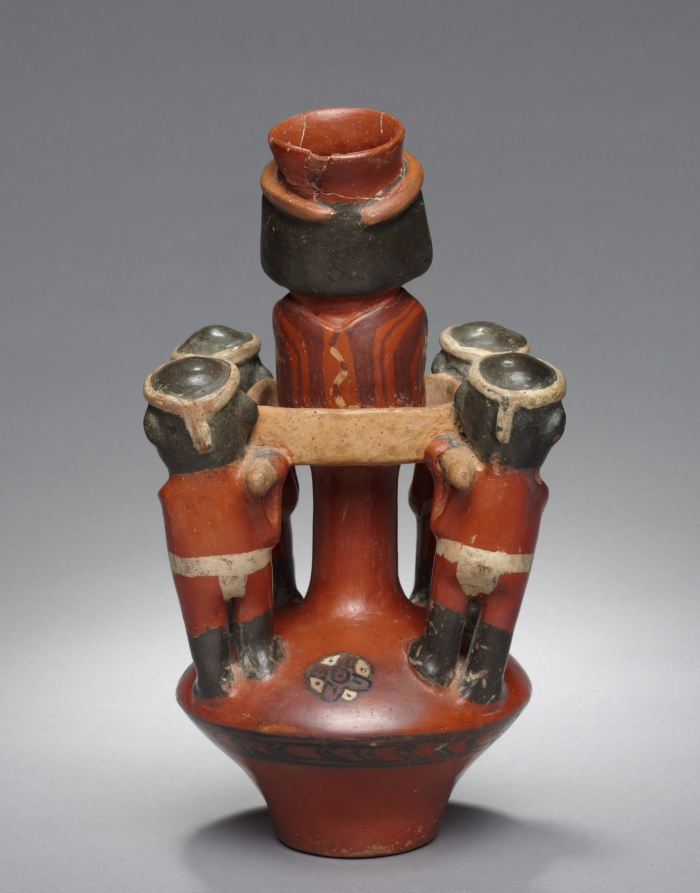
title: Vessel with Litter Group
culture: Central Andes, central highlands, reportedly Wari Wilka, Wari style, 6th-10th century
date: 600–1000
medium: ceramic and slip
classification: Ceramic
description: The sculptural scene atop this vessel's chamber depicts four porters who carry a dignitary in a litter, a high-status mode of transport. Reportedly found at Wari Wilka, a highland water shrine, the vessel empties via a long channel that passes through the body of the dignitary.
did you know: Litters were a mode of transportation reserved for people of high social status.